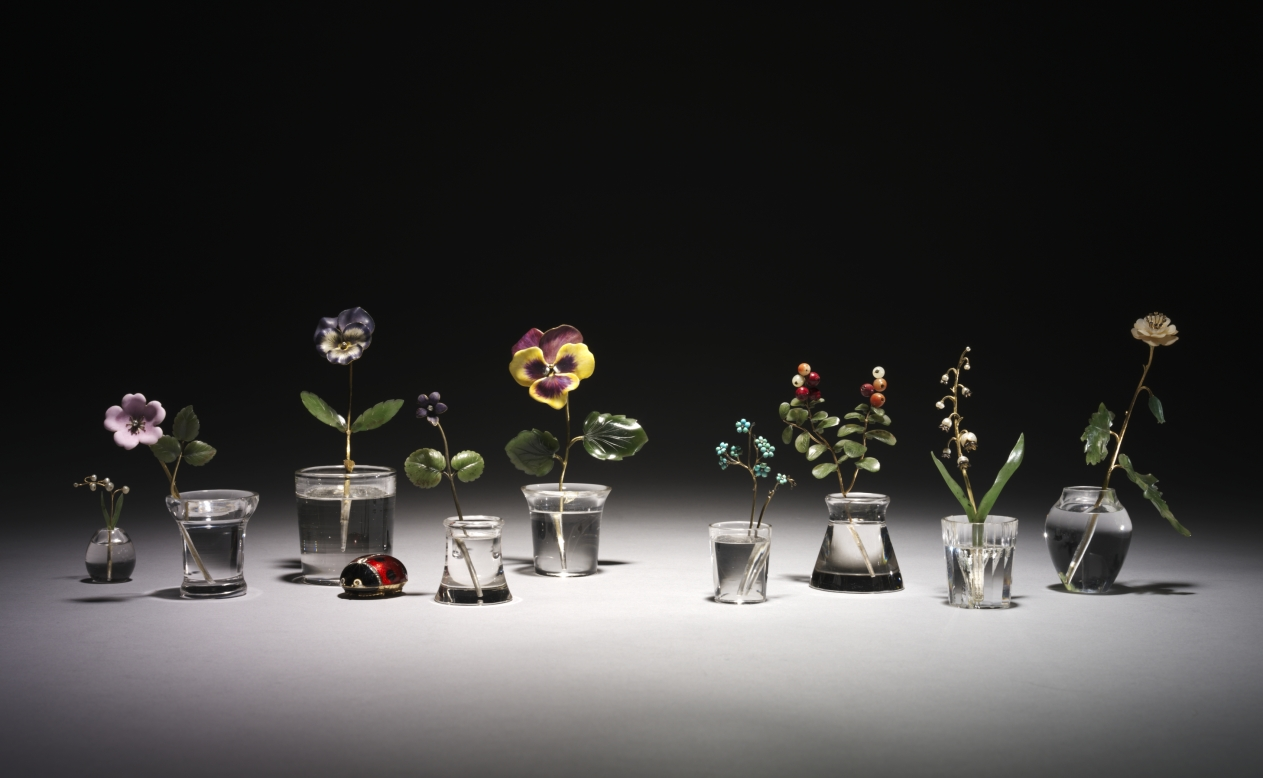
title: Pansy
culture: France, 20th century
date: before 1919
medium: gold, jade, diamonds, enamel, rock crystal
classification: Miscellaneous